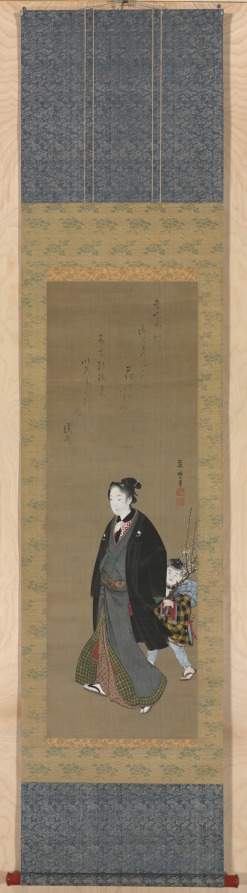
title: A Beauty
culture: Japan, Edo period (1615–1868)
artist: Fujimaro (Japanese, d. 1830)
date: c. 1810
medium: hanging scroll; ink and color on silk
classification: Painting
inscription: Artist's signature and two seals middle right side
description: Many ukiyo-e paintings and prints focus on bijin (美人), or “beautiful people.” Female courtesans and entertainers were the main draw in the pleasure district of Edo (now Tokyo), but young men were also available. The poem here reads as follows: "The full blooming cherry / is not the only flower worth mentioning. / The color of the young plum tree / blooms as well." The full blooming cherry is a metaphor for mature women, and the plum for young men.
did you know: The handsome youth in the painting is accompanied by a boy carrying a plum branch.